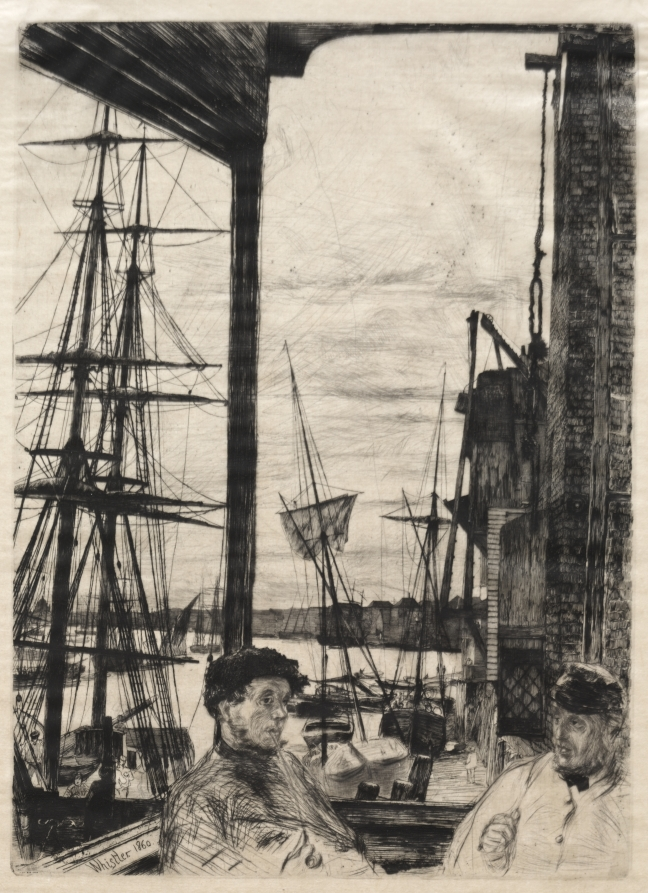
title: Rotherhithe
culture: America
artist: James McNeill Whistler (American, 1834–1903)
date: 1860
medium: etching and drypoint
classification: Print